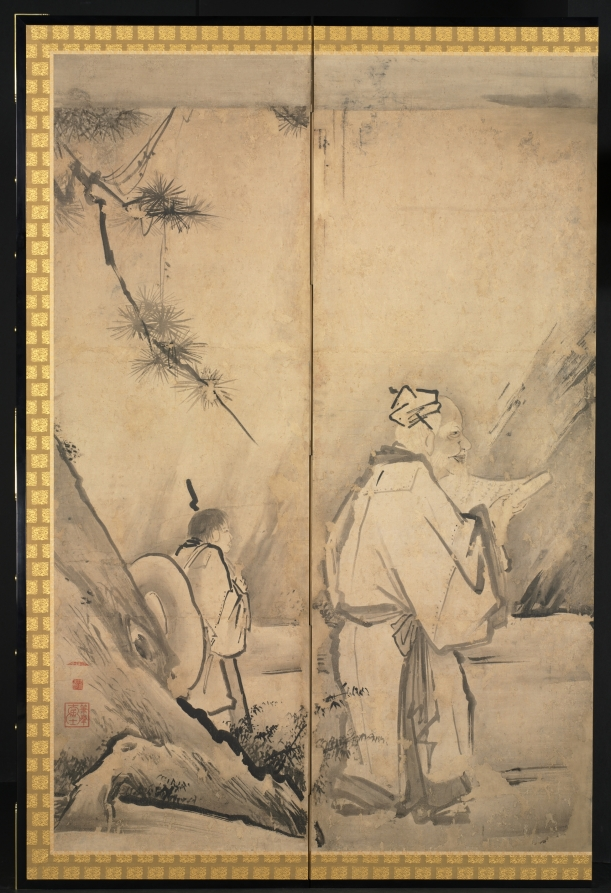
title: Four Elders of Mt. Shang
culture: Japan, Edo period (1615–1868)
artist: Kano Tan’yū (Japanese, 1602–1674)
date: 1600s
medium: pair of six-fold screens; ink on paper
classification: Painting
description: The Kano school was a group of professional artists patronized by the shogun from the late Muromachi period to the Edo period. The group adopted themes of reclusiveness to convey the importance of loyalty to the shogunate. A leader of the Edo Kano school, Kano Tanyu paired Seven Sages of the Bamboo Grove and Four Elders of Mt. Shang to reference a painting of the same theme attributed to Kano Motonobu. Seven Sages of the Bamboo Grove refers to the elites who escaped the social chaos of China’s Wei-Jin period (AD 200s–400s); they fled to a secluded bamboo grove where they could express themselves freely, enjoying pure conversation, music, and wine. The other screen, Four Elders of Mt. Shang, depicts the scholars who left the turbulence of the late Qin dynasty to pursue their scholarly interests in seclusion on Mt. Shang in Shanxi province.